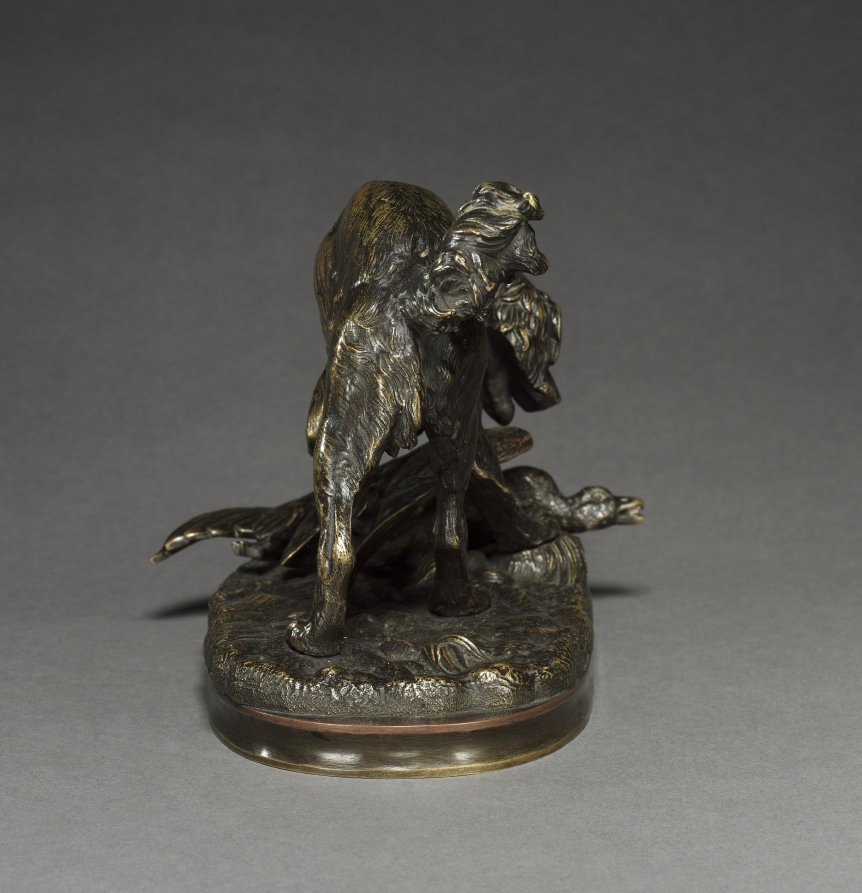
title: Spaniel and Duck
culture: France, 19th century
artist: Antoine-Louis Barye (French, 1796–1875)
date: c.1830 – 1875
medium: bronze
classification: Sculpture